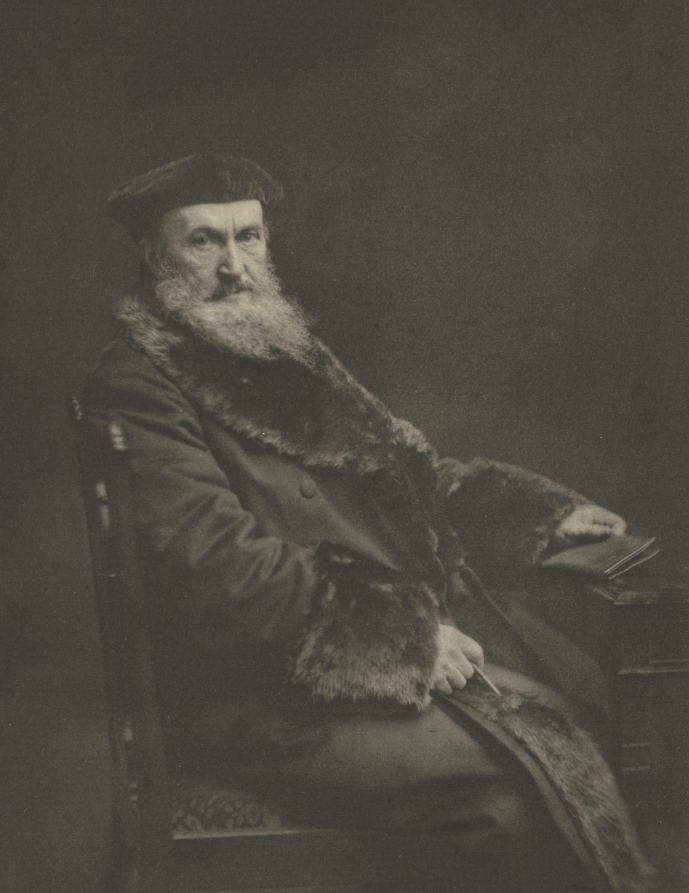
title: Camera Work: Prof. John Young, of Glascow University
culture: England, 20th century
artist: J. Craig Annan (British, 1864–1946)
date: 1904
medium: photogravure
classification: Bound Volume